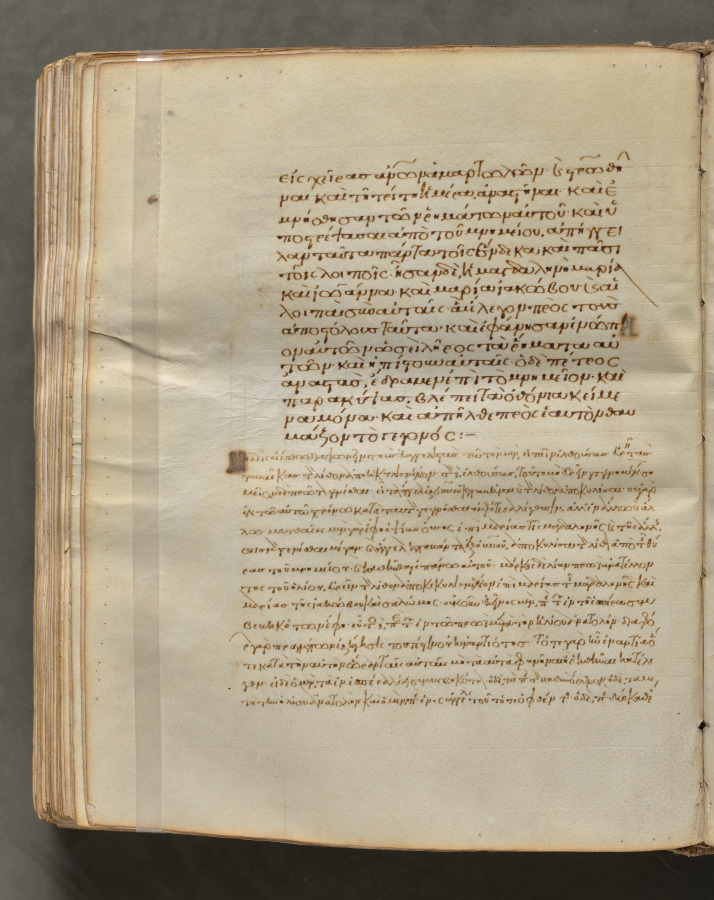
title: Text, folio 318 (verso), from a Gospel Book with Commentaries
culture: Byzantium, Constantinople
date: c. 1000–1100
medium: ink, tempera, and gold on vellum; leather binding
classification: Bound Volume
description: Each of the four gospels in this book opens on a page with brilliantly illuminated borders depicting the author of the text as well as birds—principally peacocks, symbols of the immortality of the soul—and fountains, representing the fountain of life and the salvation of the soul. This volume consists of 428 leaves with texts in Greek. Its level of sophistication suggests that it was probably written and decorated in a monastery in Constantinople.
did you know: Gospel books were carried in procession through Byzantine churches.